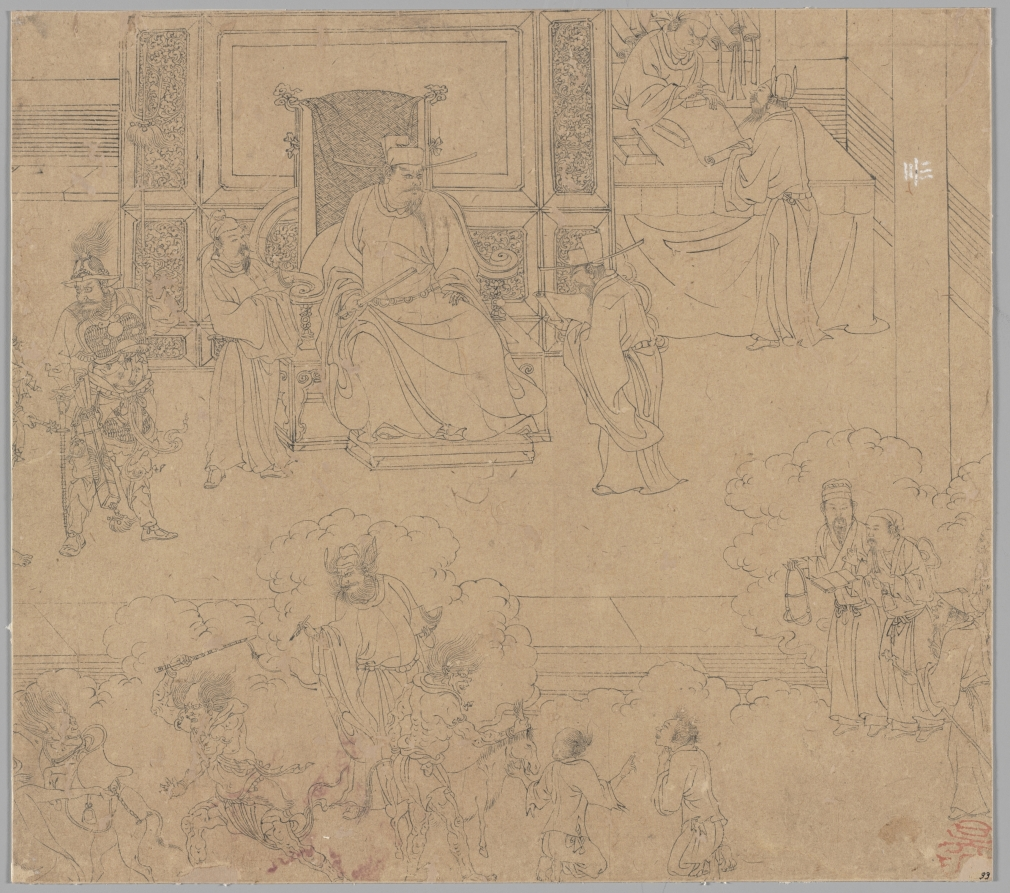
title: Album of Daoist and Buddhist Themes: Kings of Hells: Leaf 33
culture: China, Southern Song dynasty (1127-1279)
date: 1200s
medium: Album, ink on paper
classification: Painting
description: This extraordinary album has 50 paintings on a variety of religious subjects. They were likely created by several master craftsmen to share with studio apprentices as models for fulfilling commissions. The Jade Emperor and the Daoist pantheon make up the first 26 leaves. The next 14 leaves portray the Buddhist Ten Kings of Hell administering punishments to the dead. The third section, called “Clearing the Mountains,” features divine soldiers, led presumably by the deity Erlang Shen 二郎神, fighting undesirable creatures.